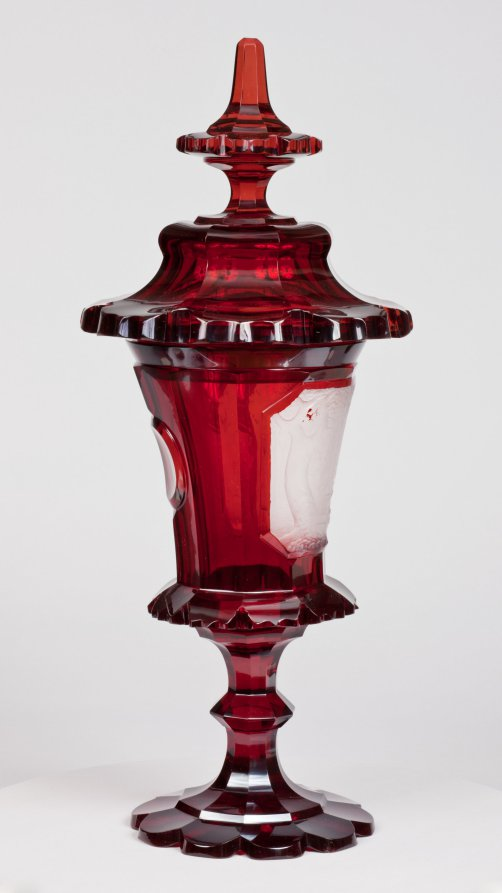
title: Covered Cup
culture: Bohemia, 19th century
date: mid-1800s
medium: ruby glass with engraved decoration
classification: Glass